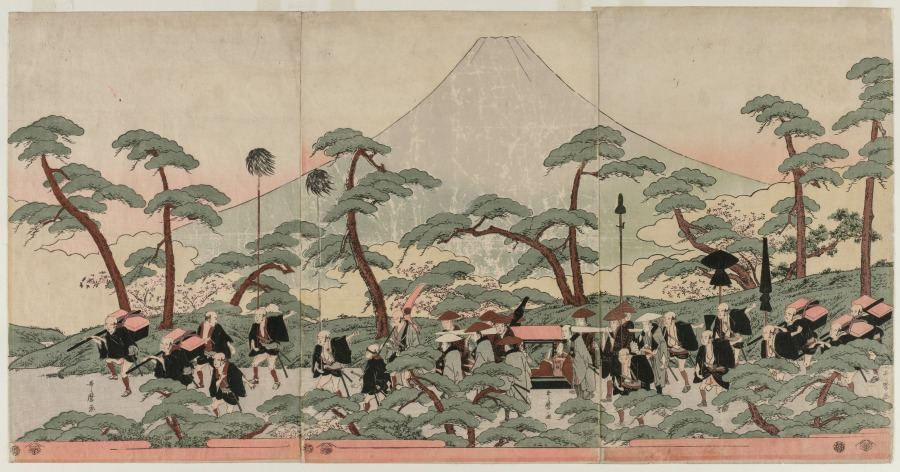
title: Procession at the Foot of Mount Fuji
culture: Japan, Edo period (1615–1868)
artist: Kitagawa Utamaro (Japanese, c. 1754–1806)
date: 1792 or 1793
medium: color woodblock print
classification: Print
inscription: Signature: Utamaro ga Publisher: Tsutaya Juzaburo (emblem) Censorship Seal: kiwame